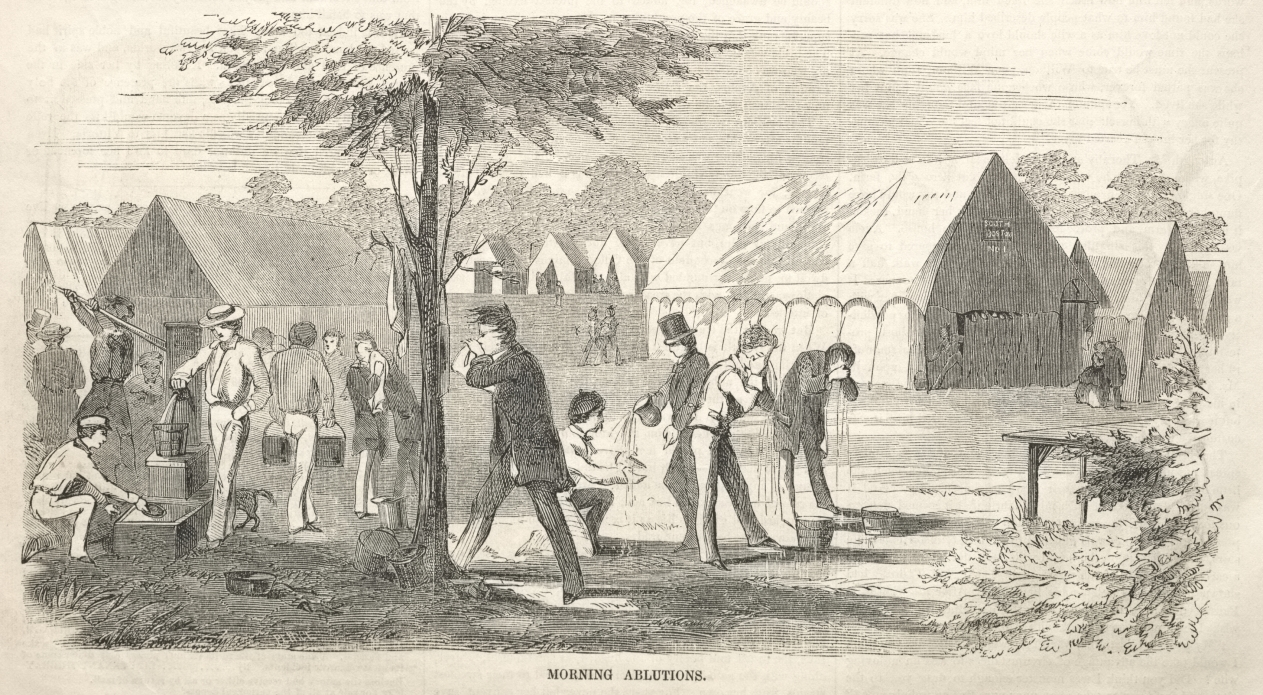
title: Camp Meeting Sketches: Morning Ablutions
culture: America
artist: Winslow Homer (American, 1836–1910)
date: 1858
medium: wood engraving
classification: Print